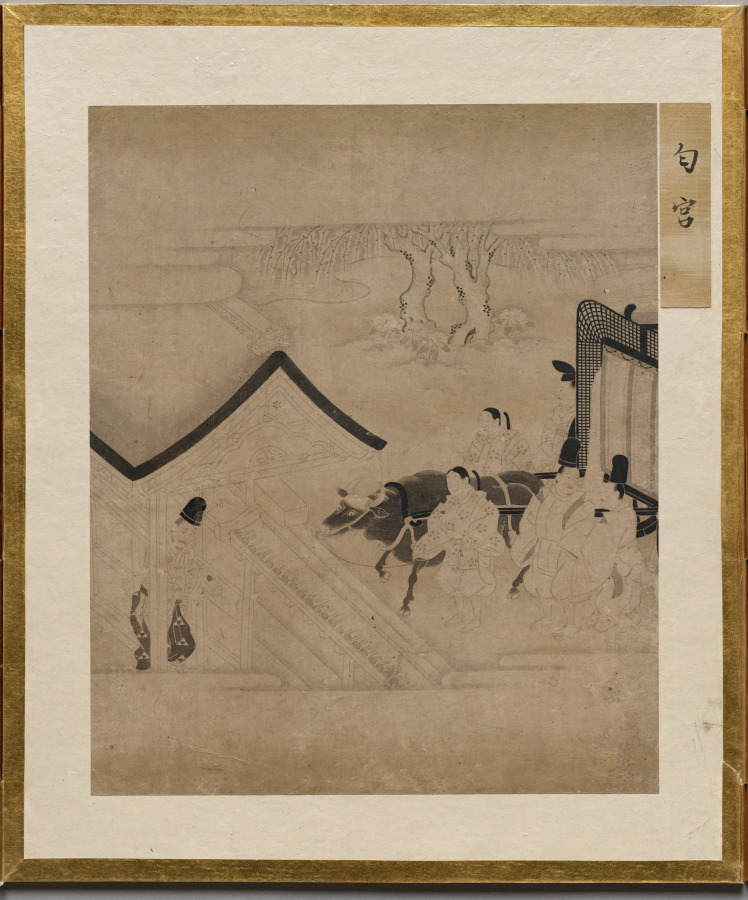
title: His Perfumed Highness from Album of Illustrations for the Tale of Genji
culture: Japan, Edo period (1615–1868)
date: 1600s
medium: painting in an accordion-style album; ink, light color, and gold on paper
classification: Bound Volume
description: This album contains illustrations for the classic literary work the Tale of Genji, authored in the 1000s by Murasaki Shikibu, an aristocrat of the Heian period (794–1185) court. The scenes are painted in the “white drawing” (hakubyō) mode, in which a fine ink line is used to depict figures and spaces with great subtlety, punctuated only occasionally by traces of red pigment for a character’s lips, a detail of a garment, or a decorative element. These two scenes illustrate episodes from the chapters “Thin Veil of Cloud” (Usugumo) and “Barrier Gate” (Sekiya).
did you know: The illustrations are identified by chapter title in cartouches to the upper right of the paintings.